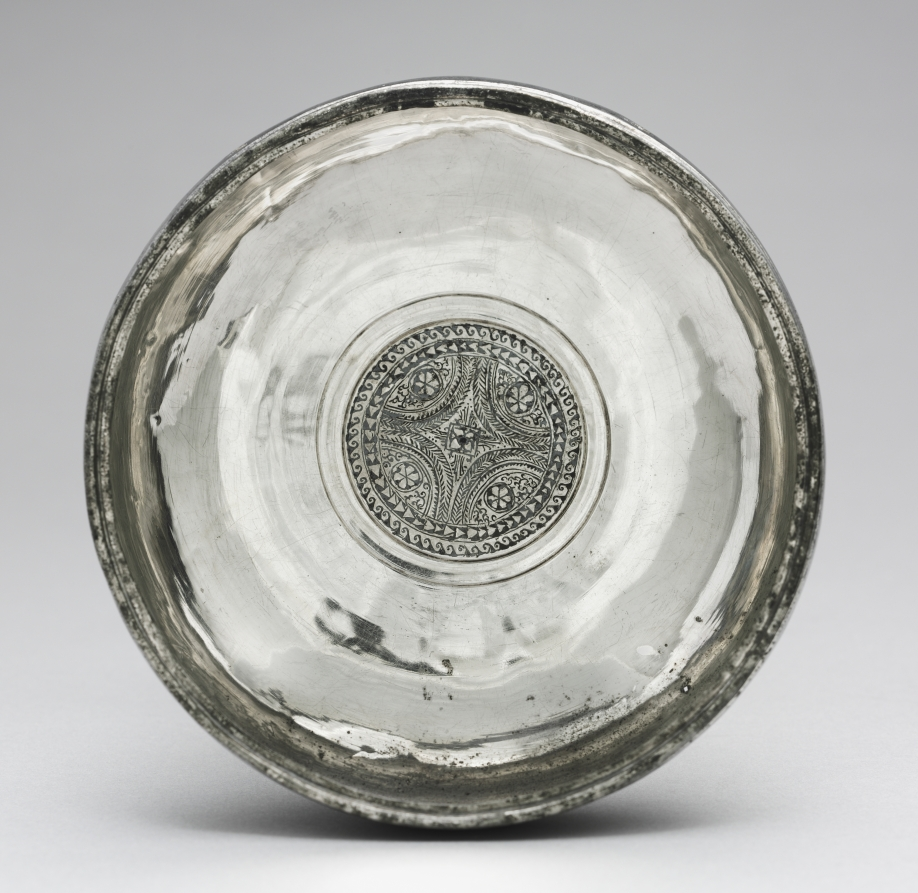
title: Bowl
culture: Byzantium, Syria(?), Byzantine period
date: 350–450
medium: silver with niello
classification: Metalwork